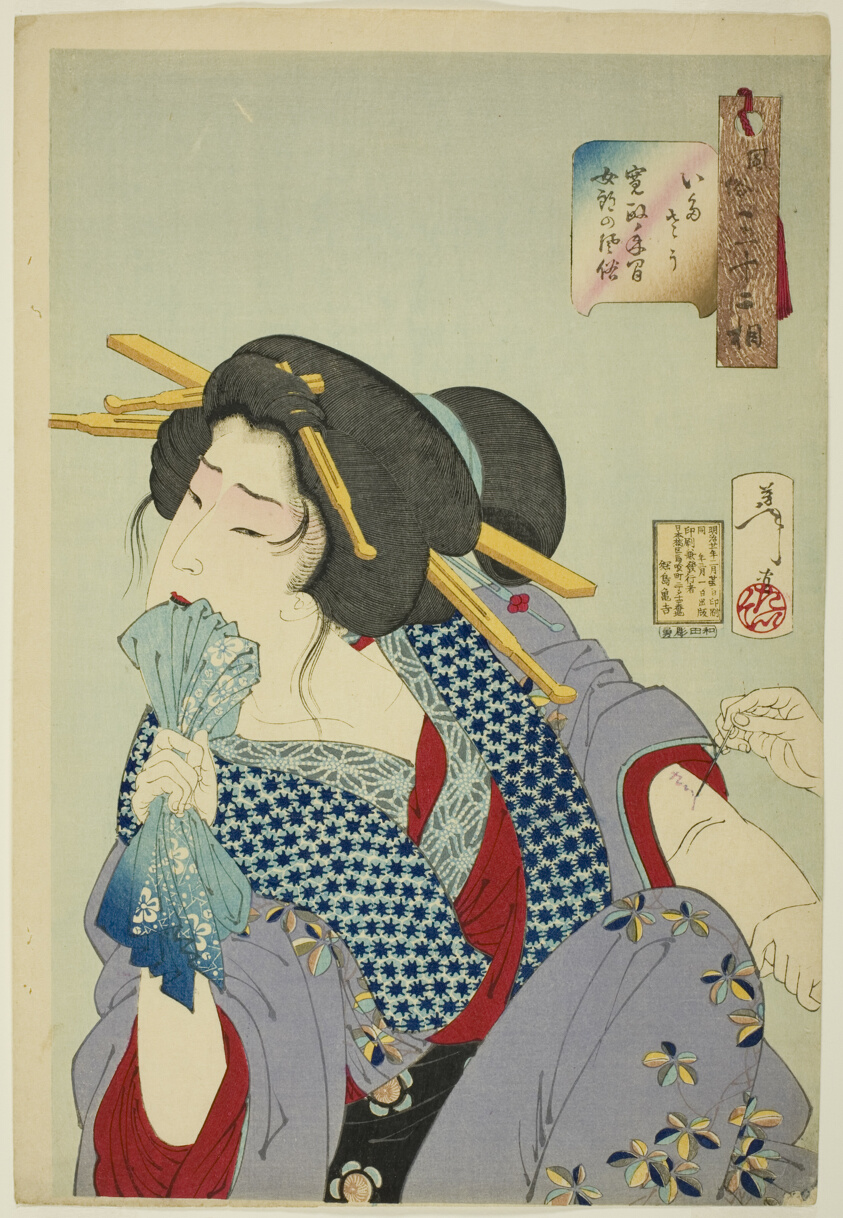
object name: Print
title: Painful (Itaso), from the series "Thirty-two Aspects of Women (Fuzoku sanjuniso)"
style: Japanese (culture or style)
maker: Tsukioka Yoshitoshi (Japanese, 1839-1892)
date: 1888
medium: Color woodblock print; oban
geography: Japan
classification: woodblock print; print; asian art